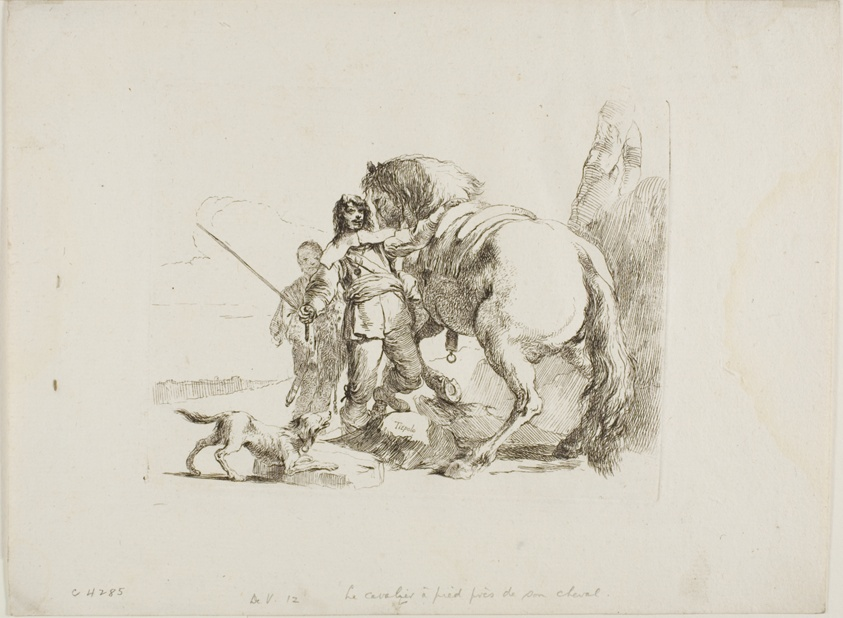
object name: Print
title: The Rider Standing by His Horse, from Capricci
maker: Giovanni Battista Tiepolo (Italian, 1696–1770)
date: 1740/50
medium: Etching on paper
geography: Italy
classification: etching; print; prints and drawing